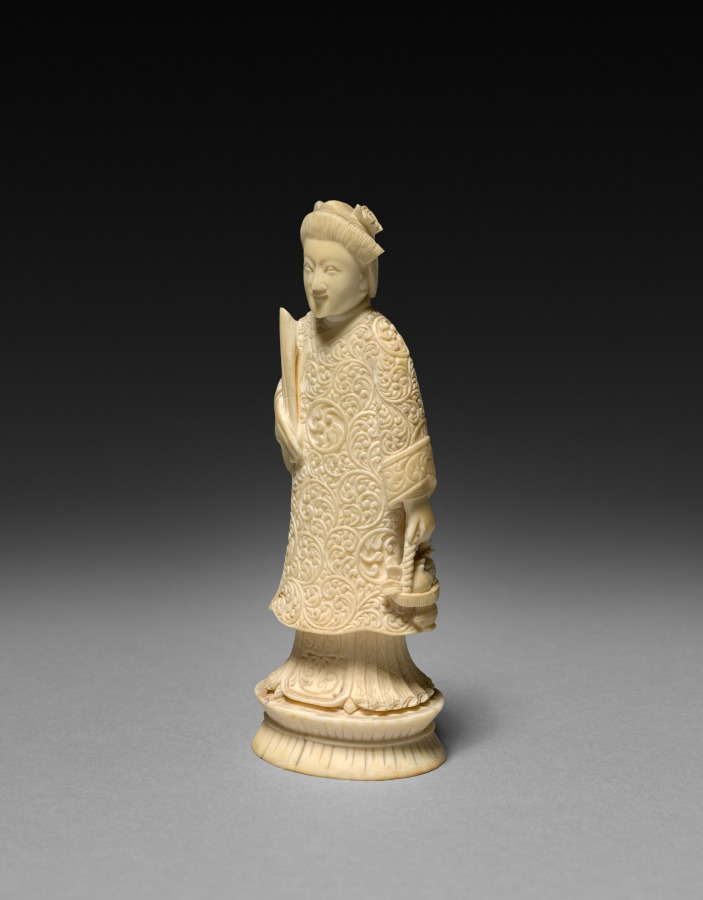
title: Chess Piece: Queen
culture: Japan, Meiji period (1868–1912)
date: early 1900s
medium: ivory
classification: Ivory